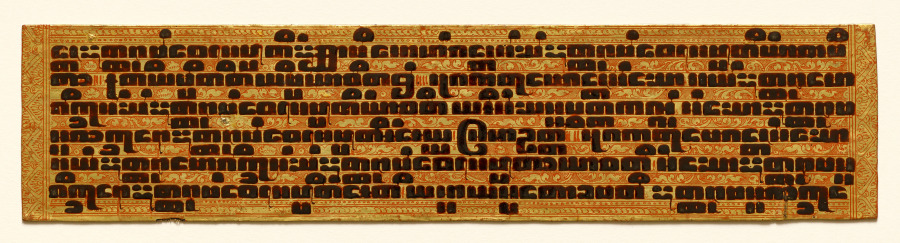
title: Text, folio 13 (recto) from a Kammavacha: Buddhist ordination text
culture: Myanmar (Burma)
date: 1800s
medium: Leaf: lacquer and gilding on cloth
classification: Manuscript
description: In premodern Burma, lay people commissioned lavishly ornamented manuscripts for ceremonial occasions, when officiants would read aloud from the text. Written in black lacquer, the text is in the language of Pali written in a Burmese script. It contains ordination rites and procedures for monastic ceremonies. The second to last page is covered with intricately drawn, winged celestial beings (nats) in gestures of praise. They fly amid intertwining vegetation—denoting bounty—that grows from serpentine forms that refer to rain clouds. Lionlike forms inhabit the space with them. The top and bottom covers are equally ornamented with jeweled floral patterning.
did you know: The Pali text of this manuscript is written in Burmese square script, which is also known as "tamarind seed script."